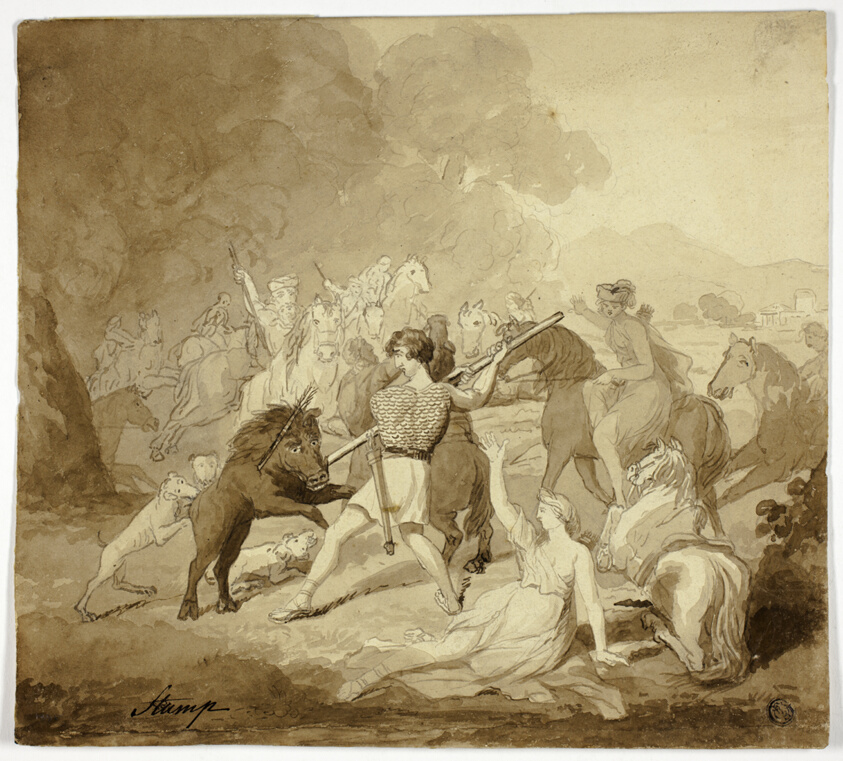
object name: Drawing and Watercolor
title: Scene from Cymbeline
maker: Samuel John Stump (English, c. 1783-1863)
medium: Pen and brown ink and brush and brown wash, over graphite, on cream wove paper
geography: England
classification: ink or chalk wash; drawings (visual works); prints and drawing; brush and wash; paper; pen and ink drawings